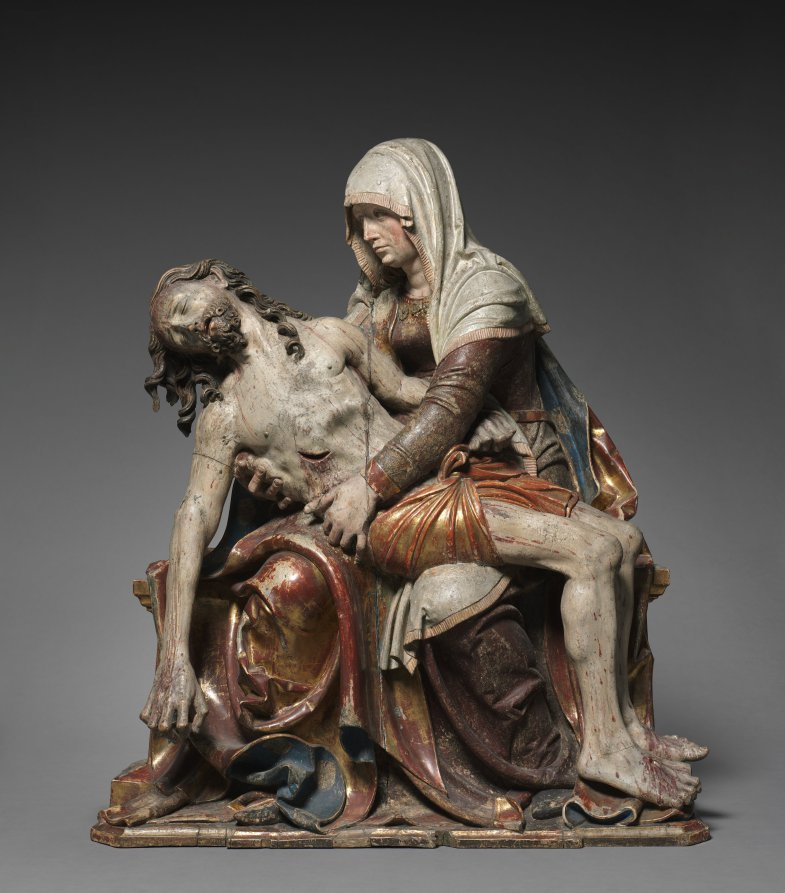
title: Vesperbild (Pietà)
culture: Germany, Upper Bavaria, 16th century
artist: Master of Rabenden (German)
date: c. 1515–20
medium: lindenwood, polychromed and gilded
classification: Sculpture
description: Depicting the Virgin cradling Christ’s dead body, works like this one were known in German as vesperbilds, owing to their incorporation into the liturgy of the evening prayer (vespers) on Good Friday. The word pietà—from the Latin pietas, meaning "piety" or "compassion"—was also used to describe such works. Like other devotional image types that emerged in southern Germany in the later medieval period, vesperbilds encouraged viewers to contemplate Christ’s suffering and empathize with the Virgin’s sorrows more directly and emotively than ever before. This anonymous German artist is named after one of his most important works, the high altar of the church of Rabenden in the Chiemgau, the foothills of the Alps. The sculpture was likely placed in a secondary chapel in a Bavarian church.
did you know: This sculpture sensitively depicts the Virgin cradling the body of Christ. This devotional image was likely placed near the altar in a German chapel. Imagine standing in a small, quiet chapel looking up at these lifelike figures with flickering candles casting dappled light onto their surface.